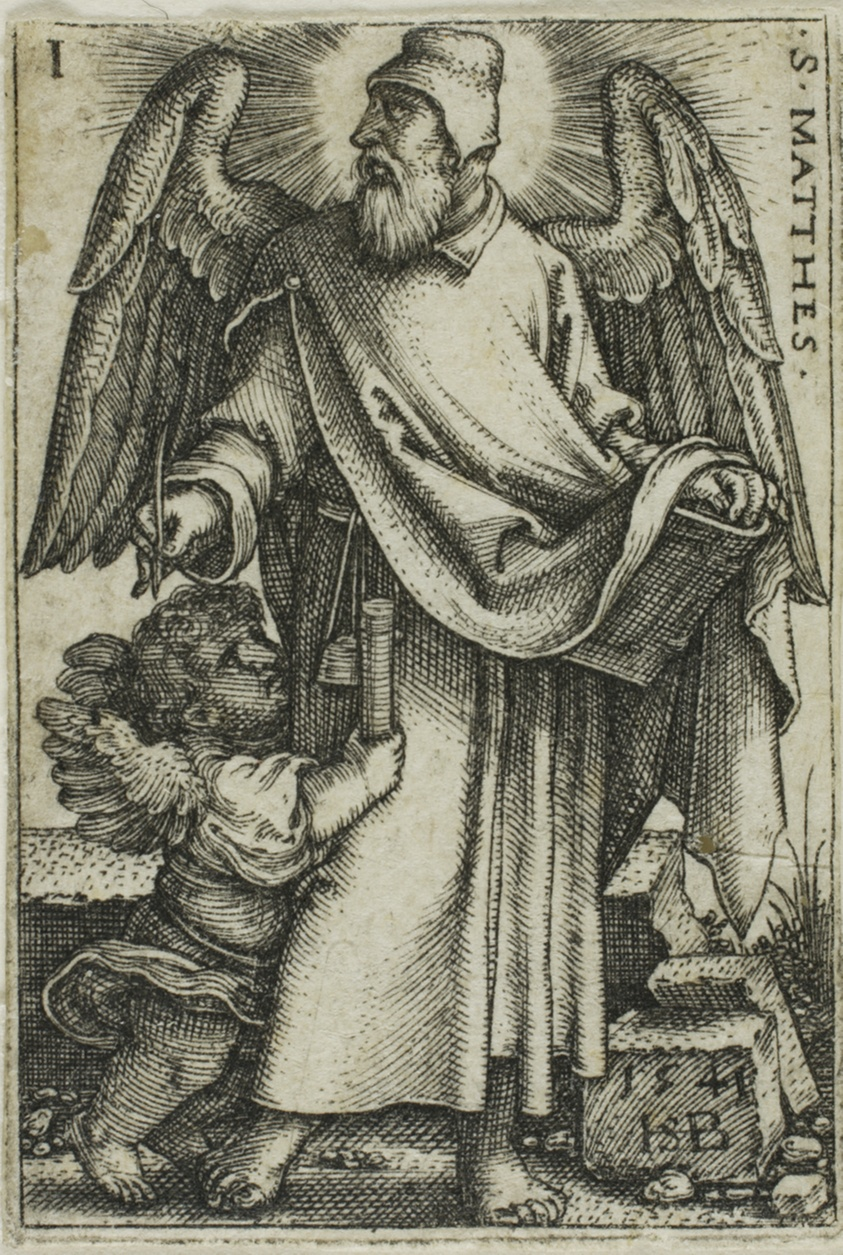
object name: Print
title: St. Matthew, from The Four Evangelists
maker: Sebald Beham; German, 1500-1550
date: 1541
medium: Engraving in black on ivory laid paper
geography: Germany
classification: engraving; print; prints and drawing